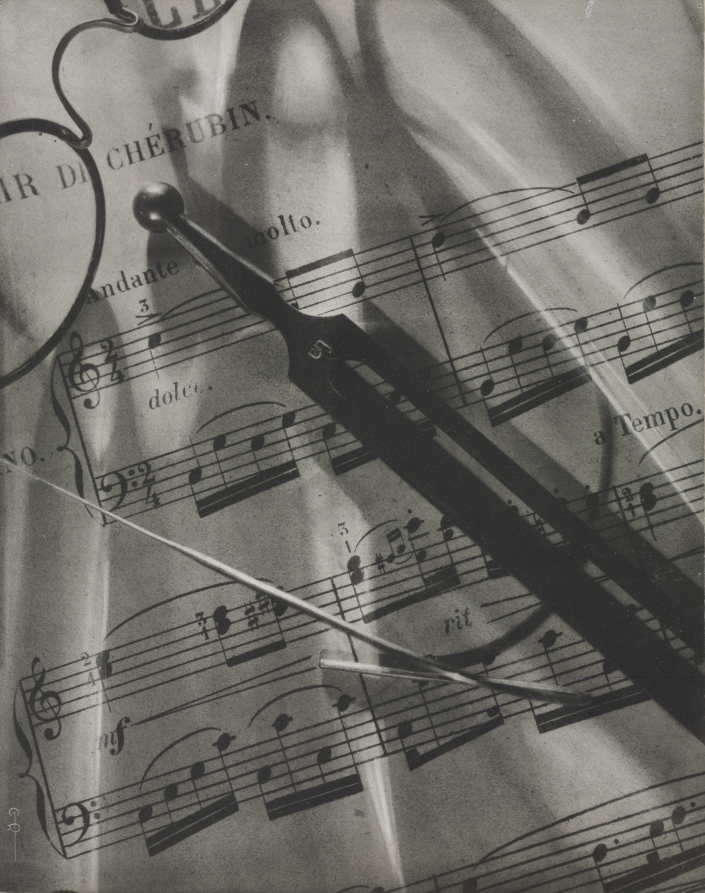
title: Interlude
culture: France, 20th century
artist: Pierre Dubreuil (French, 1872–1944)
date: 1932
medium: oil print, Rawlins oil print process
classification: Photograph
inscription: Written in pencil on recto: artist's monogram; "Entracte"; in blue ink on verso: "79 [?]"; "Entr'act."; in pencil: "P. Dubreuil, M.L.[?] S.P."; in black ink: "No. 1 [underlined]- / Propriete de G. GHEUDE [underlined]- / Président A.B.P.C. / Bruxelles [underlined]"; in pencil: "D 098 / M"; in red crayon: "Z"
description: In Pierre Dubreuil's carefully planned still life, ordinary objects—a musical score, tuning fork, and eye glasses—are given an air of mystery. The photograph reveals the artist's interest in bold light and shadow patterns, strong contrasts of tone, and distorted scale and perspective, achieved through the use of a close-up viewpoint and an unusual camera angle. A pioneering modernist little known until recently, Dubreuil's preoccupation with the dream world and the human psychological condition linked him with the Surrealists of Brussels and Paris.